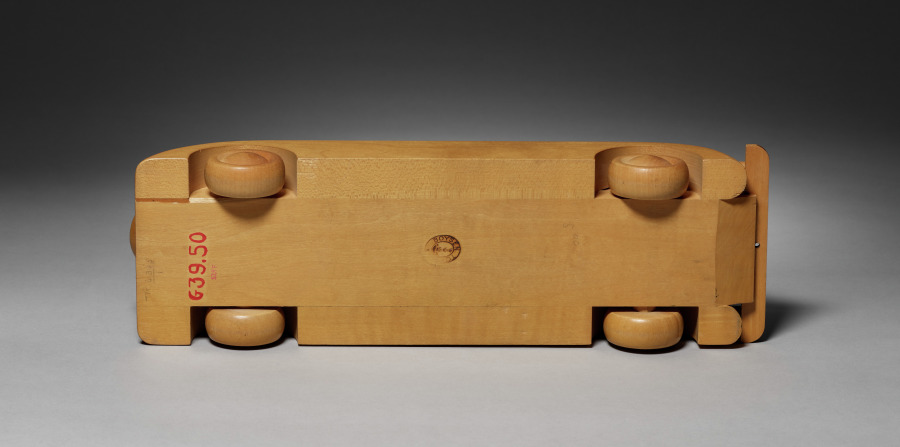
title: Streamline Automobile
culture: Denmark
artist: Boysen Toys (Danish)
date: 1900s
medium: wood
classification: Wood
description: Credit line: John D. Rockefeller General Education Board Grant II